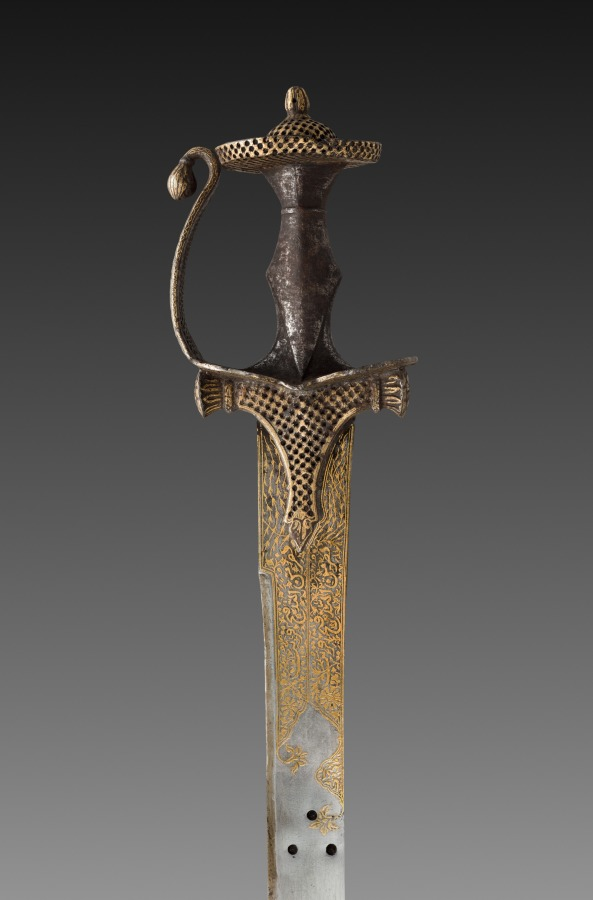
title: Tulwar Sword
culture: India, probably Deccan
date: 1700s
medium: Iron hilt with gold; steel blade with gold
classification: Arms and Armor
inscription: Help [comes] from God, and Victory is imminent.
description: This long curved sword and scabbard are of the kind used and worn by Mughal nobility, as seen often in paintings. The openwork hilt is a characteristic of swords from the southern Indian region known as the Deccan. By the end of the 1500s, the Mughals began making regular incursions into the Deccan as they attempted to expand their empire, increasing the exchange of art forms. Repeated four times, twice on one side of the blade and twice on the other in gold inlay, is the same line from the Qur'an 61:13: “Help [comes] from God, and Victory is imminent.” This is a popular inscription on daggers, banners, and other instruments of war, as it reassures the combatants that God is on their side, and therefore they can in good faith expect a speedy victory if they fight valiantly.